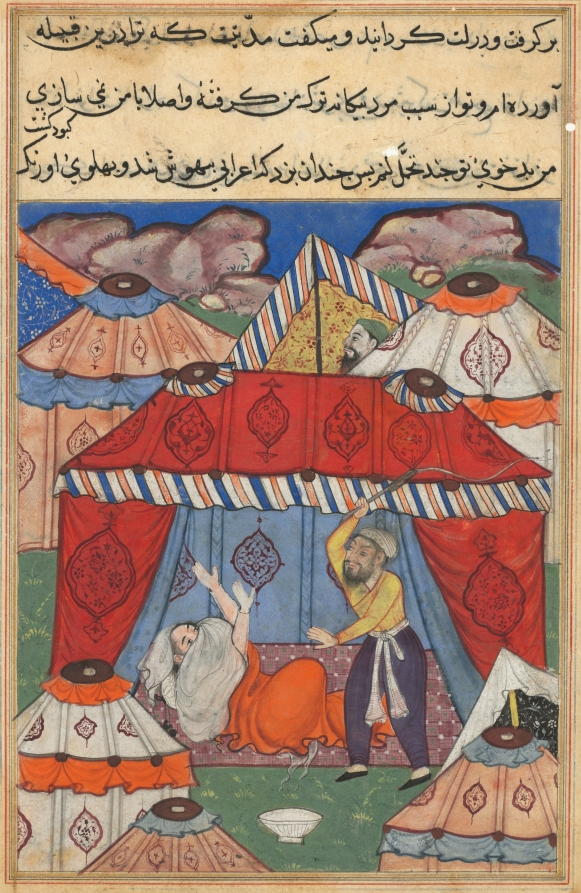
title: The disguised Arab, substituting for Habbaza, is whipped by her husband for refusing a bowl of milk, from a Tuti-nama (Tales of a Parrot): Twenty-fourth Night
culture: Mughal India, court of Akbar (reigned 1556–1605)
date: c. 1560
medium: gum tempera, ink, and gold on paper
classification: Painting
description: While Habbaza is away carrying on an affair with her lover Bashir, Bashir’s friend dresses in Habbaza’s clothes and waits in her tent. Each night, Habbaza’s husband offers her milk and when she refuses, leaves her in peace. This time, however, he becomes enraged at her silence and lashes out.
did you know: The white bowl of milk sits neglected in the center of the scene.